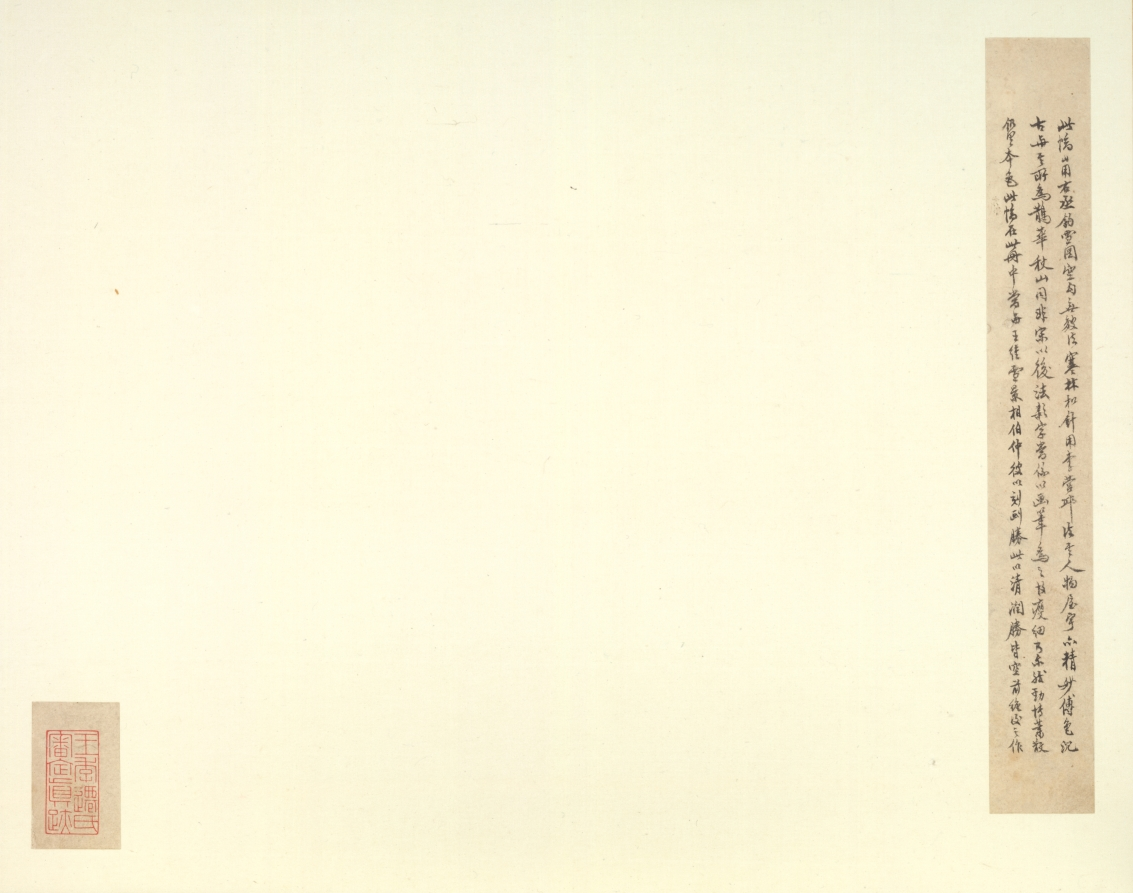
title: River Village: Fisherman's Joy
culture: China, Yuan dynasty (1271-1368)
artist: Zhao Mengfu (Chinese, 1254–1322)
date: c. 1302–3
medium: Fan painting mounted as album leaf; ink and color on silk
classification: Painting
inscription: 江村漁樂 子昂。 [印] 趙氏子昂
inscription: 1 colophon and 2 additional seals: 1 colophon, unsigned; 2 seals of C. C. Wang 王季遷 (1907–2003).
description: The artist of this blue-green–style landscape, Zhao Mengfu, was a southerner, versed in all fields of literati pursuits, such as calligraphy and connoisseurship. A princeling of the defeated Southern Song dynasty, he was nevertheless successfully recruited by Khubilai Khan to the Mongol court in the new capital, Dadu (modern Beijing), in 1286. This painting combines a distinctively southern flat watery landscape combined with features of the northern landscape tradition, notably the spiky trees, branches, and rough-surfaced rocks.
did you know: Various human elements can be found in the painting: two fishermen, an individual with a donkey, and someone in the house.